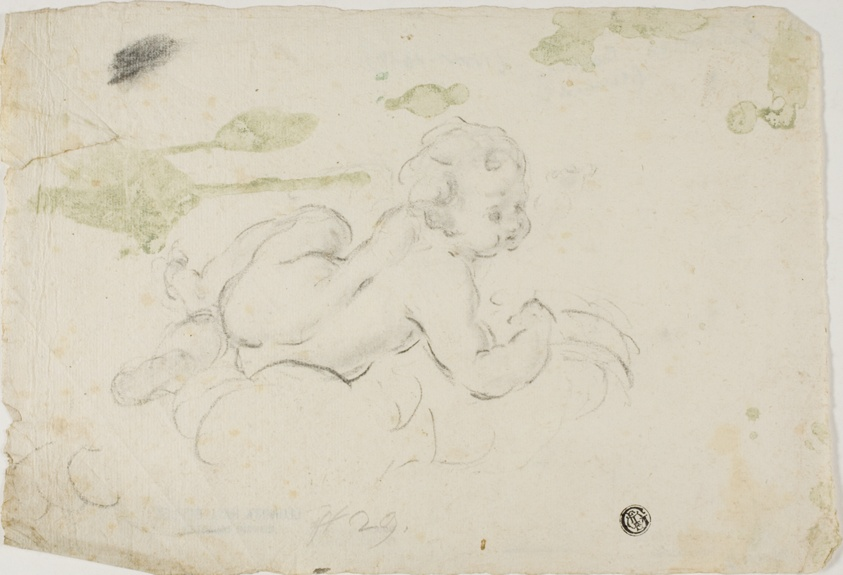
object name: Drawing and Watercolor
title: Putto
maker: Lodovico Carracci (Italian, 1555-1619)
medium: Black chalk, with stumping, on ivory laid paper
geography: Italy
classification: chalk; drawings (visual works); prints and drawing